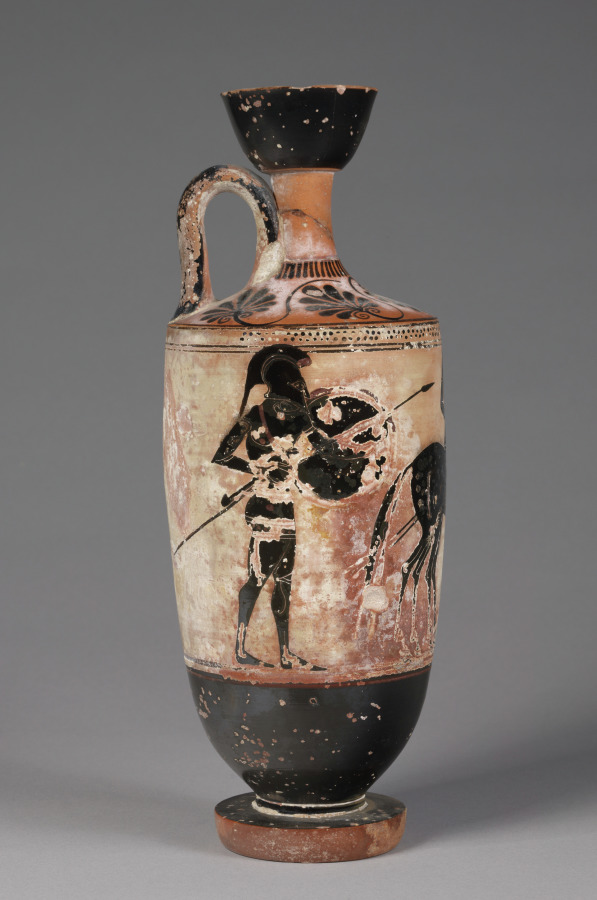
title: Black-Figure White-Ground Lekythos (Oil Vessel): Horseman, Horse between Warriors, Dog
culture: Greek, Attic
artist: attributed to Edinburgh Painter (Greek, Attic, active c. 505–485 BCE)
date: c. 500 BCE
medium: ceramic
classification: Ceramic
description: Two armed warriors, each wearing a crested helmet and holding a spear and shield, flank a mounted horseman, who leads another horse. The warrior at right reaches up with one hand to the head of the second horse, raising the question of how he still holds his spear. Below, a dog twists to scratch itself and look back, its right hind foot apparently resting on one of the warrior’s.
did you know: The Edinburgh Painter was the first artist to paint black-figure decoration on a white ground.